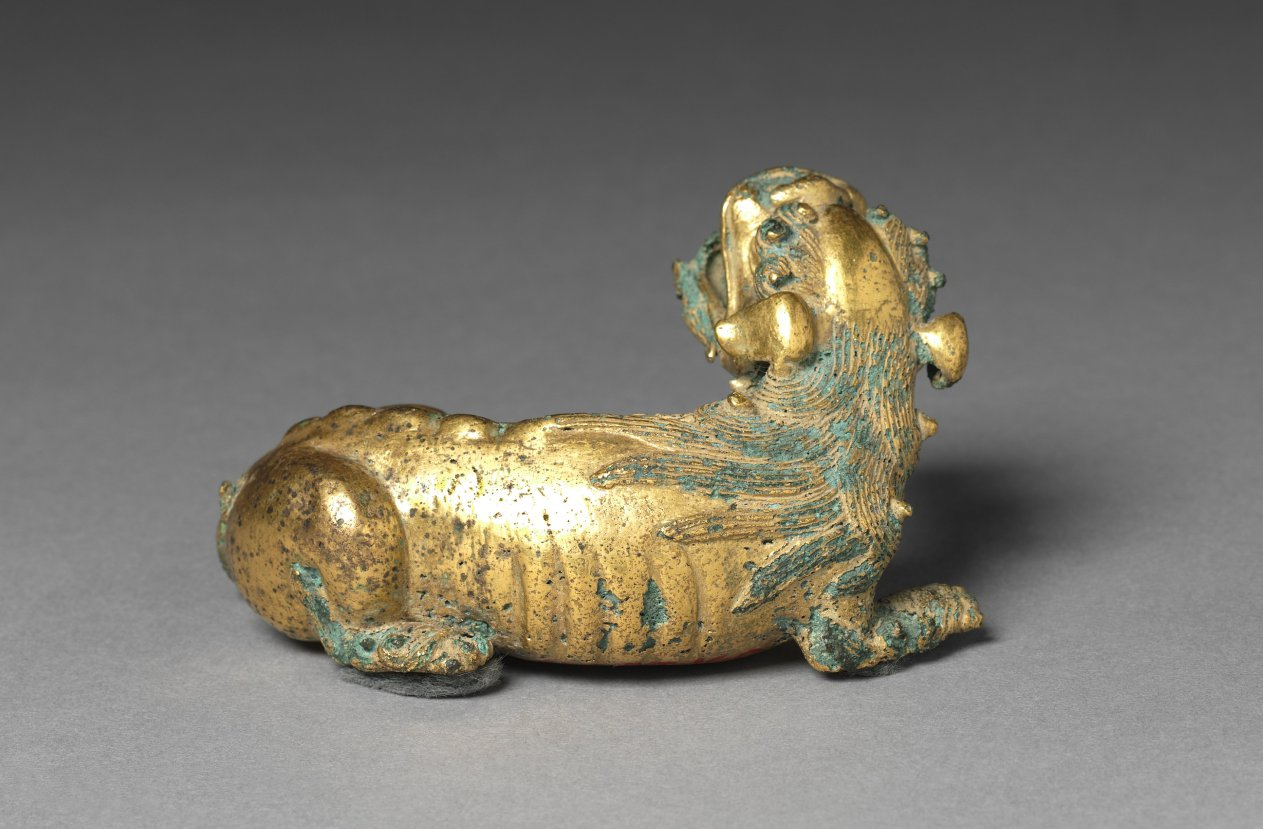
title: Dog-shaped Paperweight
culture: Korea, Unified Silla period (676-935)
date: 676–935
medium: gilt bronze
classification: Sculpture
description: This small object in the shape of a hybrid dog-lion is believed to have been used as a paperweight. Since the Three Kingdoms period (57 BC−668), mercury amalgam gilding had been widely employed to embellish metal objects as well as to make their surface resistant to acids. This technique involves mixing pure gold powder with liquid mercury to form a paste-like mixture. As heat is applied, the mercury evaporates, but an opaque layer of gold remains on the surface. This coating must be polished by first rubbing it with dried rice seedlings, then processing it in ash lye to eliminate impurities; next, the piece is washed and rinsed in a plum vinegar bath.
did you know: This is a dog and lion hybrid.